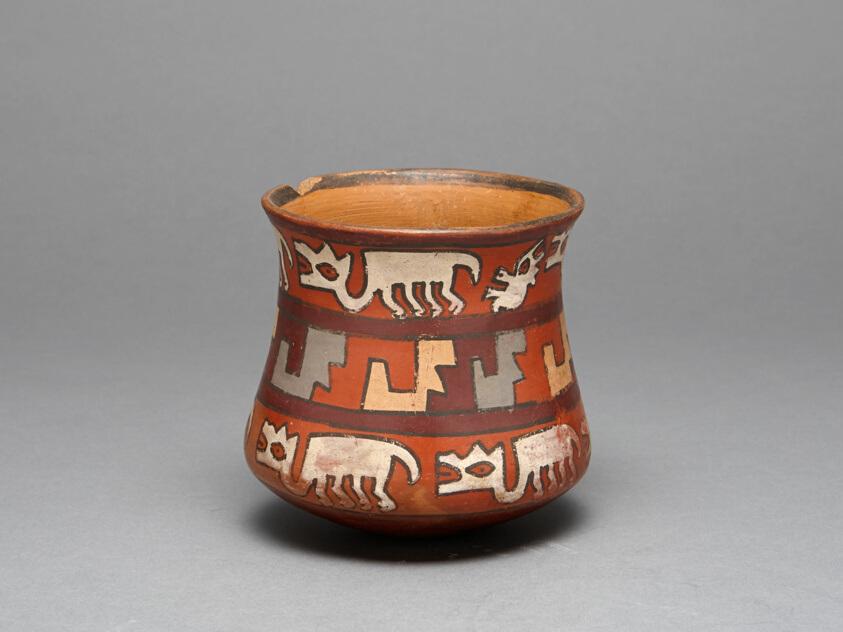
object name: Vessel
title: Jar Depicting Rows of Llamas and Abstract Stepped Motifs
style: nazca, early intermediate period, Pre-Columbian, americas, Arts of the Americas, andean, andes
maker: Nazca; South coast, Peru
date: 180 BCE–500 CE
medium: Ceramic and pigment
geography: Peru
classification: earthenware; art of the americas; ceramics; vessel